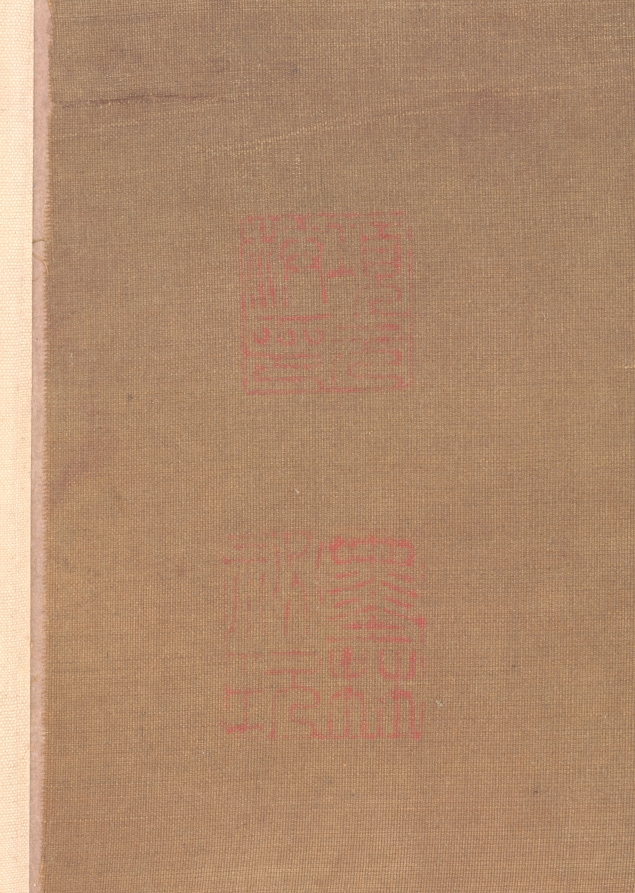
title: Bamboo and Ducks by a Rushing Stream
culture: China, Southern Song dynasty (1127–1279)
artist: Ma Yuan (Chinese, c. 1150–after 1255)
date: 1127–1279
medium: hanging scroll; ink and light color on silk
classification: Painting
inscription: 馬遠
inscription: 12 additional seals: 1 of An Kuo (1481–1534); 7 of Hsiang Yüan-pien (1525–1590); 2 of Liang Ch'ing-piao (1620–1691); 2 unidentified. (WKH)